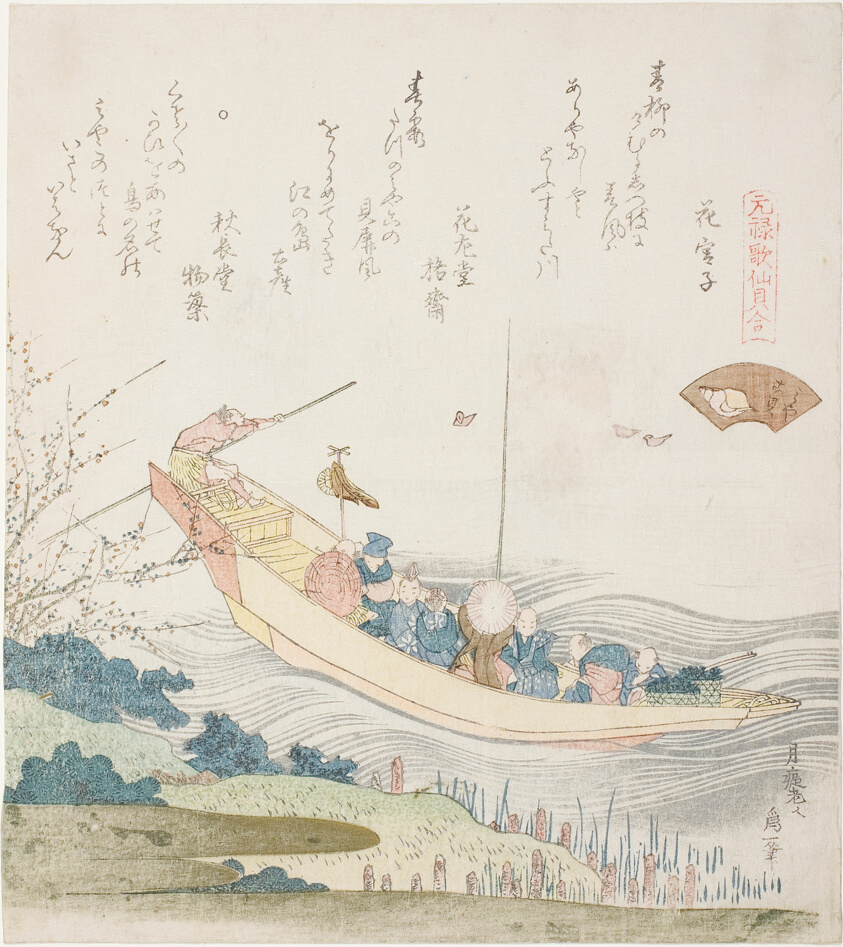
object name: Print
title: Ferry boat on the Sumida River, illustration for the Capital Shell (Miyako-gai), from the series "A Matching Game with Genroku-period Poem Shells (Genroku kasen kai awase)"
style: Japanese (culture or style)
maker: Katsushika Hokusai 葛飾 北斎; Japanese, 1760-1849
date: 1821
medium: Color woodblock print; shikishiban, surimono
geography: Japan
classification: woodblock print; print; asian art